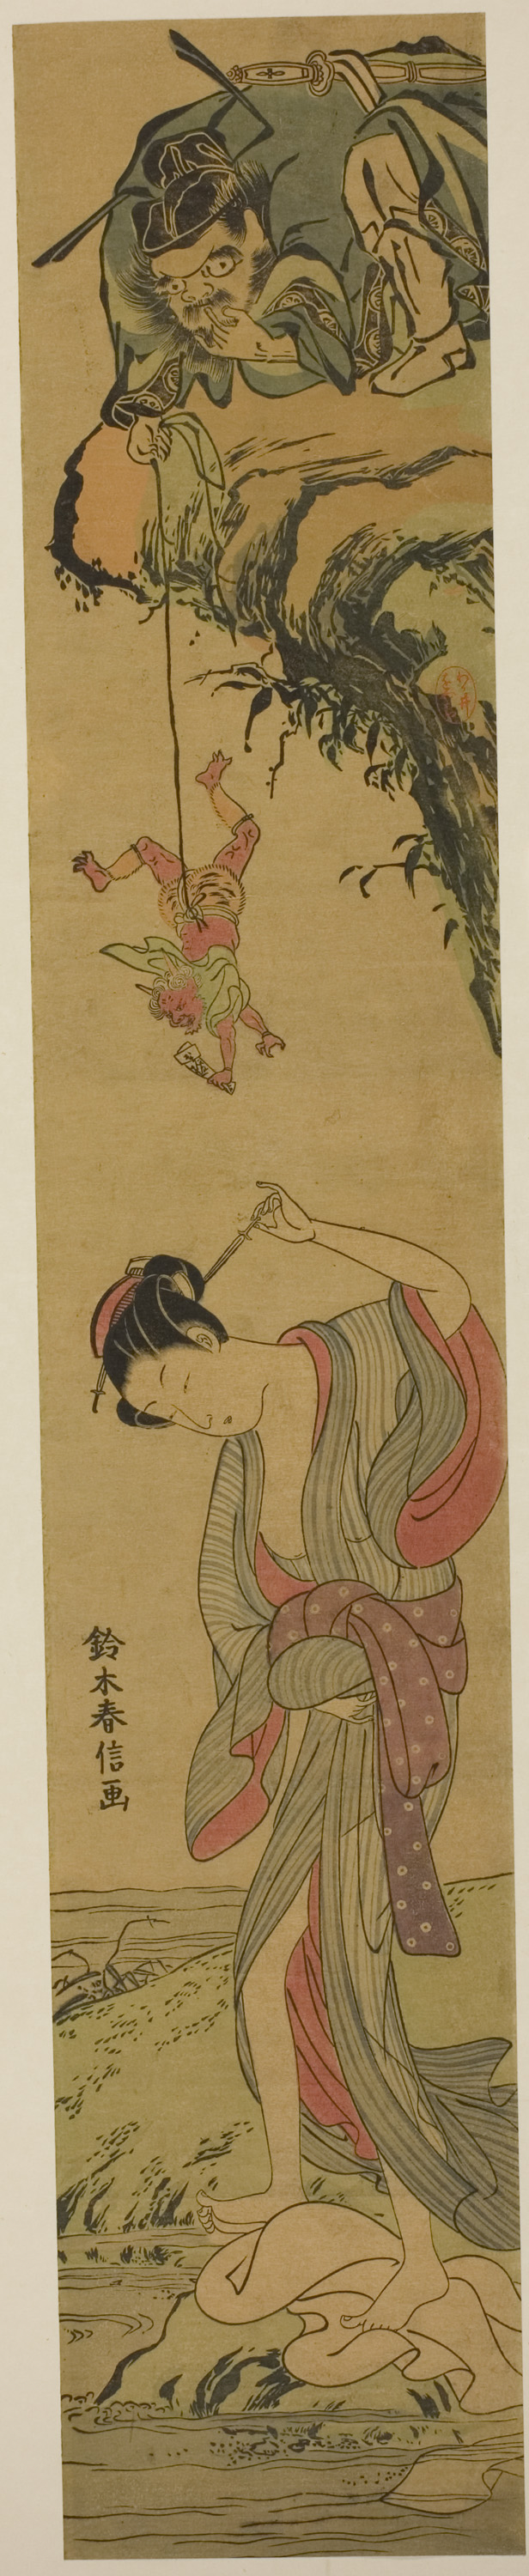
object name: Print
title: Shoki in Love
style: Japanese (culture or style)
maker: Suzuki Harunobu 鈴木 春信; Japanese, 1725 (?)-1770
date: c. 1768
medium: Color woodblock print, hashira-e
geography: Japan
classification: woodblock print; print; asian art